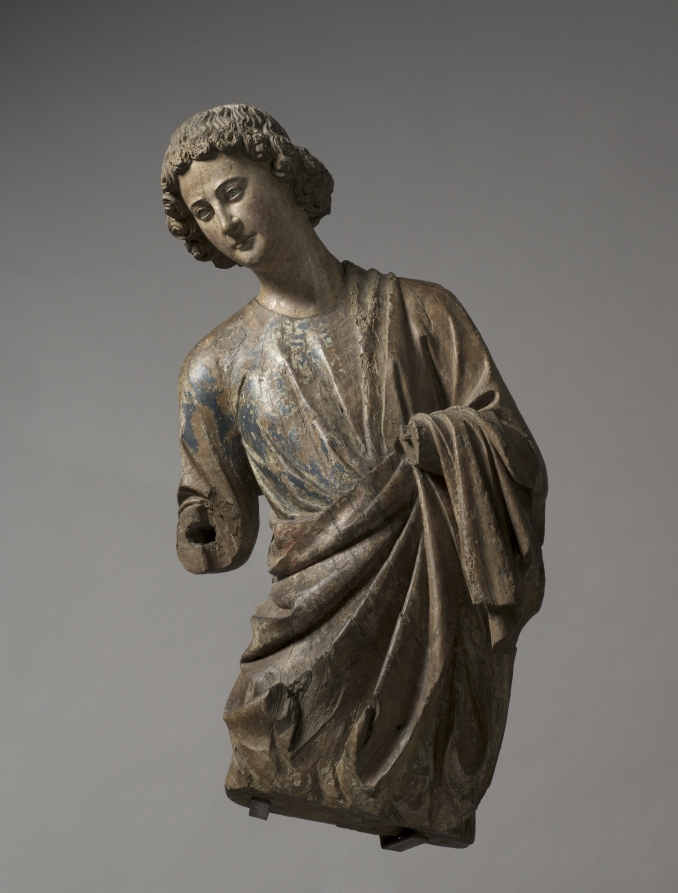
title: Angel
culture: France, vicinity of Reims, 13th century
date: c. 1250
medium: walnut with traces of gilding and polychromy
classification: Sculpture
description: Surviving in fragmentary condition, this pair of angels lacks lower arms, hands, wings, and attributes. Their original paint and gilding, now almost entirely lost, once rendered their garments a rich brocade and their hair a luxuriant gold. Nonetheless, in their graceful poses and sublime faces—which may portray tragic interest, anguish, or deep concern—their original delicacy and power are still evident. They embody the monumental style of 13th-century High Gothic cathedral sculpture in France. Their style specifically suggests they were carved in or around Reims, possibly by sculptors associated with the cathedral there. Their original placement is unknown, but they may have flanked an altar on columns.